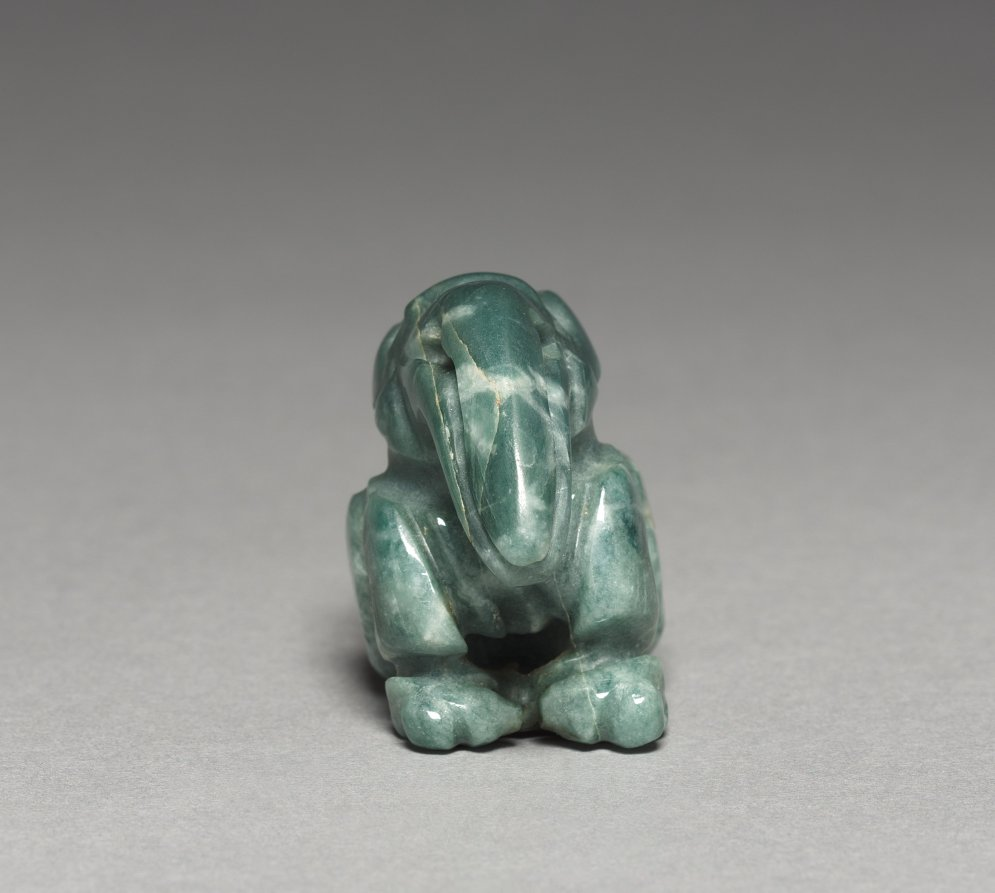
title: Bird Pendant (Buzzard or Vulture?)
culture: Costa Rica, Atlantic Watershed region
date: c. 300 BCE–600 CE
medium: jadeite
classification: Jewelry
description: Before about AD 500, when gold-working technologies were adopted in Costa Rica, jade was the quintessential luxury material and it was masterfully carved into exquisite ornaments of many kinds. Ancient Americans did not use many metal tools, and artists carved jade, a tough stone, with implements of stone, bone, bamboo, or reed.